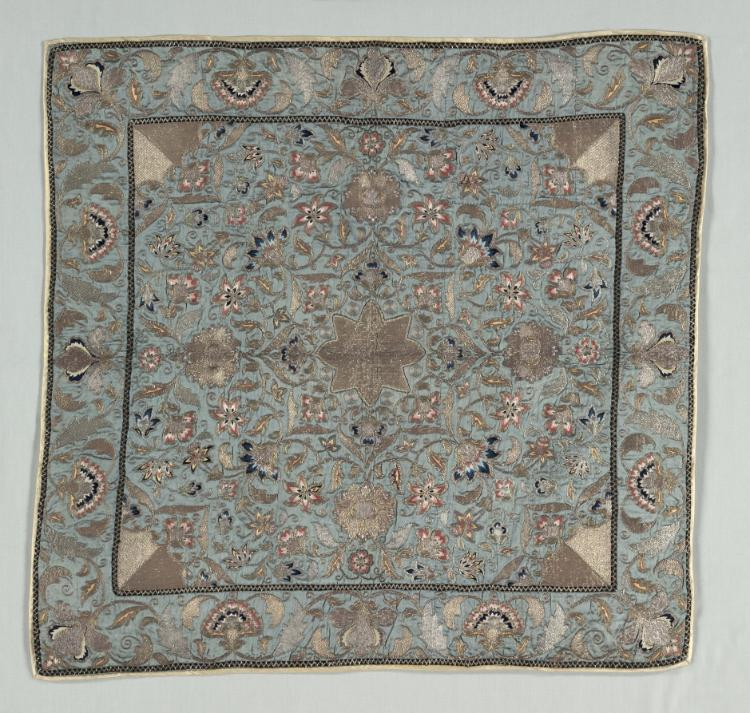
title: Embroidered Panel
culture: India, 18th-19th century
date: 1700s - 1800s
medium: embroidery; silk and metallic threads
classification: Embroidery